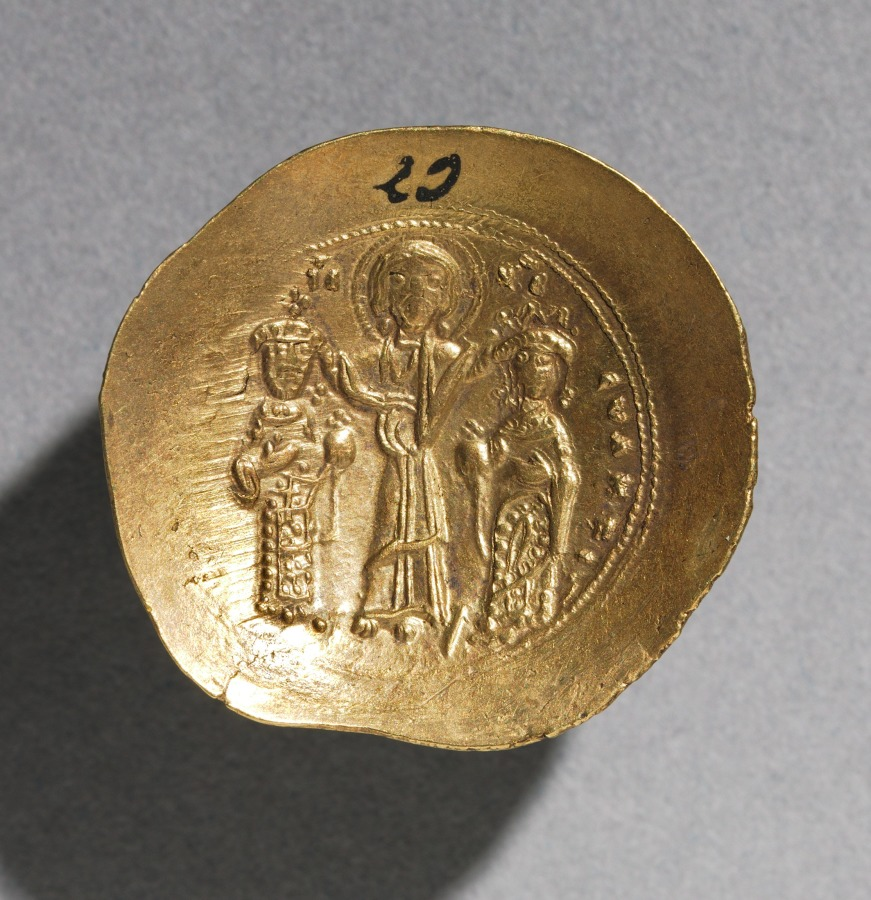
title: Nomisma with Eudocia and Romanus IV Diogenes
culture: Byzantium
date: 1068–1071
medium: gold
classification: Coins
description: Byzantine Gold Coins The vast number of surviving Byzantine coins attests to the level of trade across the empire. Controlled and supervised by the emperor, the producers of coins took care to represent his authority and reflect his stature. Talented artists were recruited to engrave the dies (molds) used for the striking of coins. Emperors increasingly came to include their heirs and co-emperors on their coinage, as well as other family members or even earlier rulers. Coins were recognized, then as now, as small, portable works of art. With their inscriptions and images, Byzantine coins provide valuable documentation of historical events and a record of the physical appearance of the emperors. The coins shown here include the solidus, the basic gold coin of 24 karats; the tremissis, a gold coin of one-third the weight and value of the solidus; and the nomisma, which in the 10th century replaced the solidus as the standard gold coin.